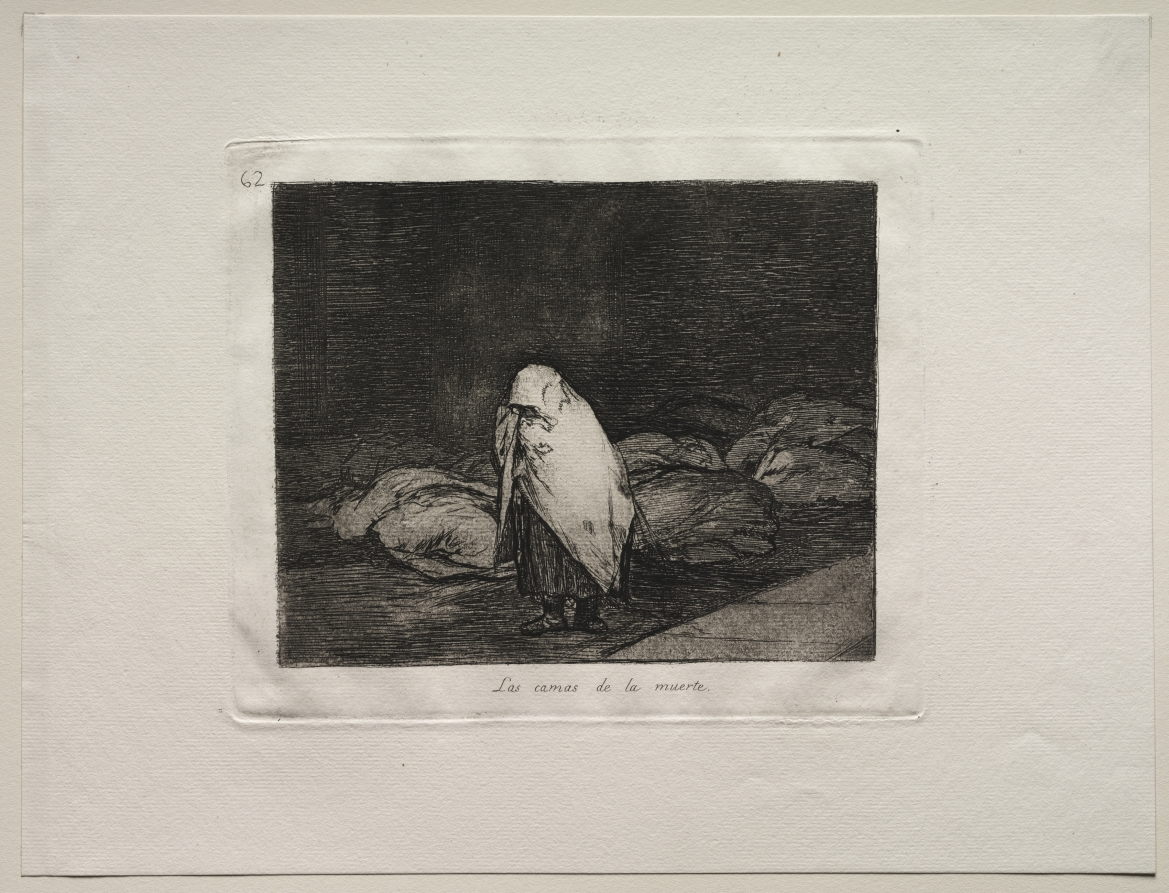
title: The Horrors of War: The Beds of Death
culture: Spain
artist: Francisco de Goya (Spanish, 1746–1828)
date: c. 1810–20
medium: etching and aquatint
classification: Print